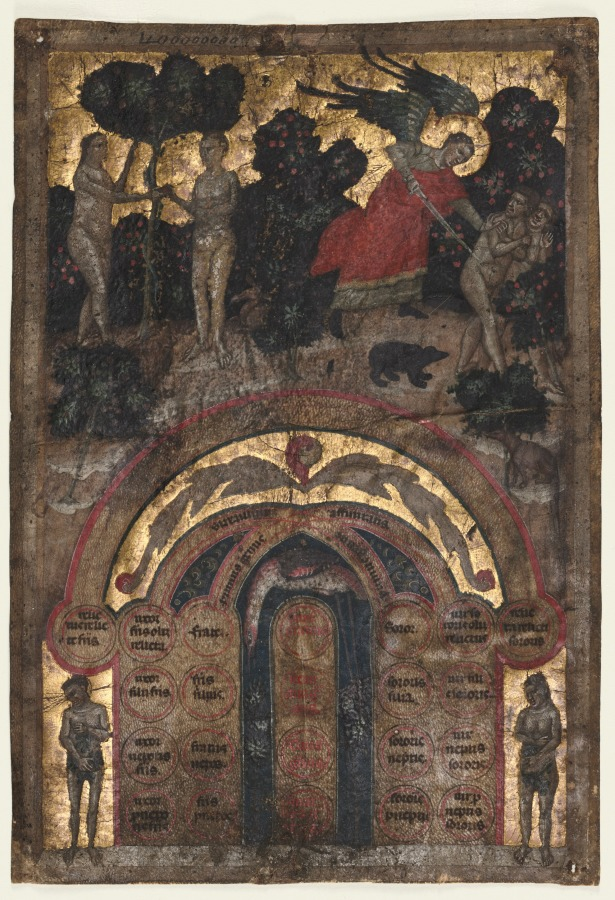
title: Leaves from a Volume of Johannes Andrea's "Lectura super arboris consanguinitatis et affinitatis: Table of Affinity and Table of Consanguinity"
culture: Italy, Bologna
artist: Master of the Register of 1328 (Italian)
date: c. 1331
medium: ink, tempera and gold on vellum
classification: Manuscript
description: The two leaves shown here come from Iohannes Andrea's widely circulated treatise on marriage impediments. The writer lived until 1348 and is known as the most learned of the lay canonists of the Middle Ages. He taught for nearly fifty years at the University of Bologna, where his lectures on both canon and Roman law made him famous.